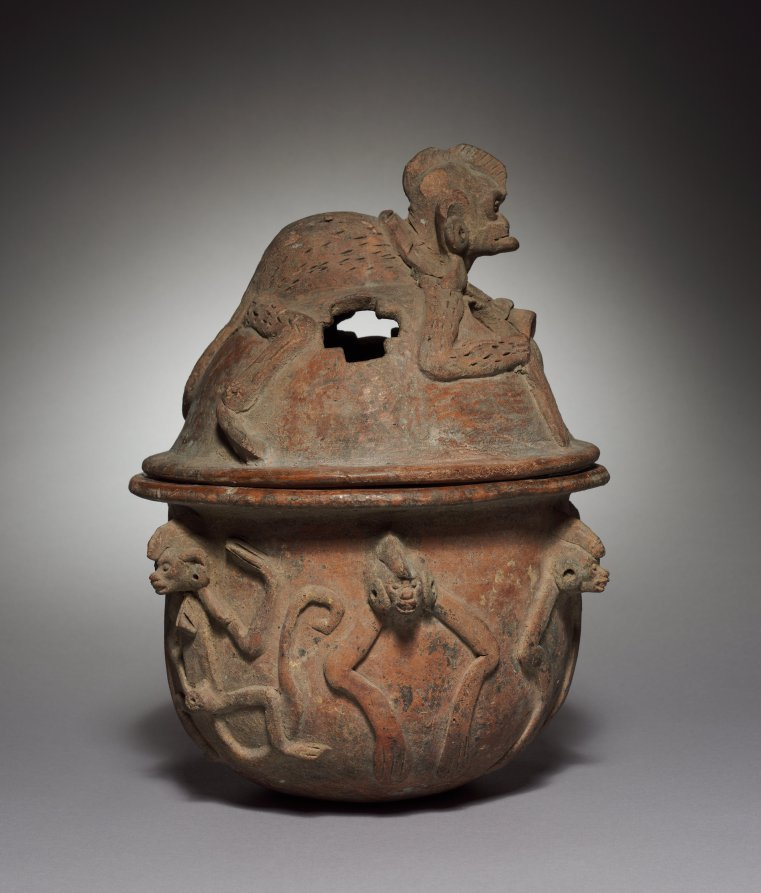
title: Incense Burner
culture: Guatemala, Quiché, San Juan Cotzal, Maya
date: 600–1000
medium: pottery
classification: Ceramic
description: According to the Popol Vuh, a sixteenth-century Quiché Maya manuscript, the world has been created and destroyed twice, and we now live in the third creation. In the second creation, human beings were made from wood and reeds. They lacked souls and minds, and they did not revere their creator. Because of these imperfections, most were killed by an uprising of utensils and domestic animals. Monkeys are the descendents of the survivors.